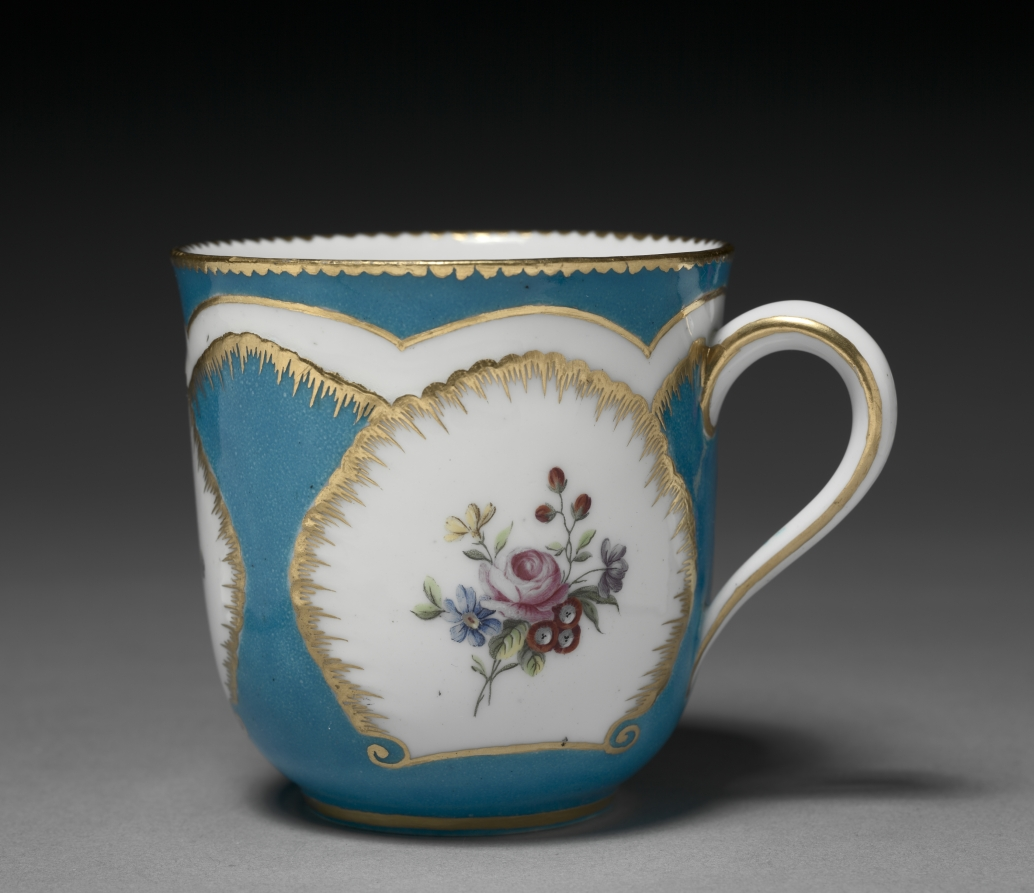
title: Cup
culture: France, Sèvres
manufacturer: Sèvres Porcelain Factory (French, est. 1756)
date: 1759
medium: soft-paste porcelain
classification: Ceramic